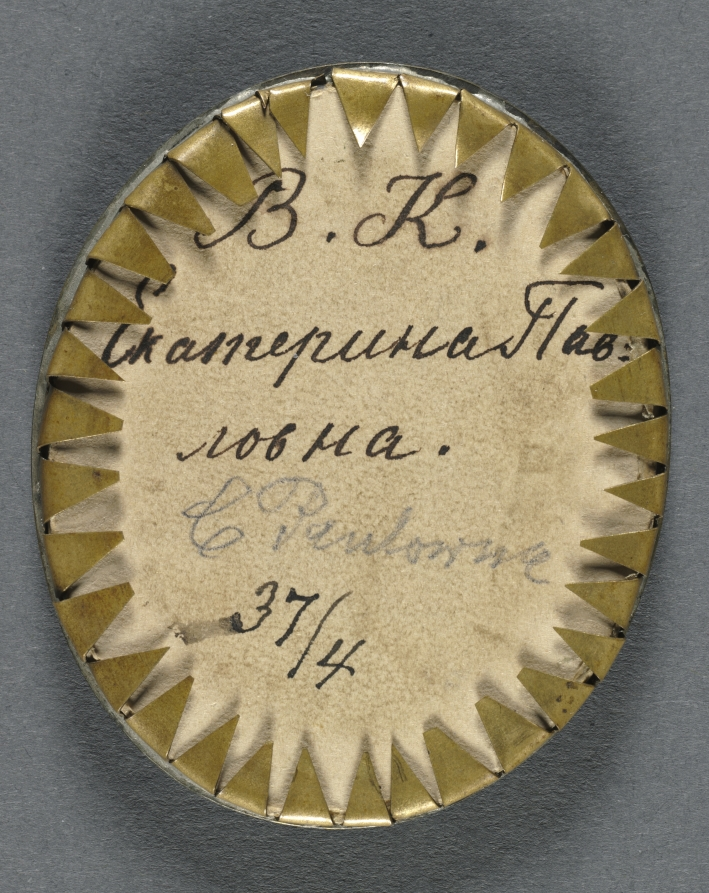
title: Portrait of Grand Duchess Catherine Pavlovna, later Queen of Württemberg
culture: Russia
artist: Alois Gustav Rockstuhl (Russian, 1798–1877)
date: c. 1860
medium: watercolor on ivory on a gilt metal mount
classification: Portrait Miniature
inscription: Signed at right center: Rokstuhl [in Cyrillic]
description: The miniature of Grand Duchess Catherine Pavlovna, later Queen of Württemberg, is among the finest of Alois Gustav Rockstuhl's portraits. It portrays Catherine at around 4 years of age and is one of the few miniatures of children in the museum's collection. This work was painted several decades after Catherine's death and is based on a large-scale, late 18th-century oil painting by Petr Zharkov. A member of Catherine's family likely commissioned the portrait from Rockstuhl as a memento. Zharkov also painted Catherine's three sisters in similar poses, and although Rockstuhl probably reproduced these portraits in miniature as well, the location of each is currently unknown. The star of the Order of Saint Catherine is partially hidden beneath the delicate white ruffled neckline of her dress. The only order available to women in imperial Russia, it established Catherine as a member of the royal family while also referring to her saintly namesake. Catherine grew to be an intelligent and charming woman, deeply loved by her older brother Tsar Alexander I and famous for rejecting the marriage proposal of Napoleon Bonaparte. Catherine married twice, gaining the title Queen of Württemberg through her second marriage to her cousin Prince William of Württemberg. She died tragically of erysipelas complicated by pneumonia in 1819 at the age of 31, leaving behind four children and a reputation as a charitable and kind ruler.